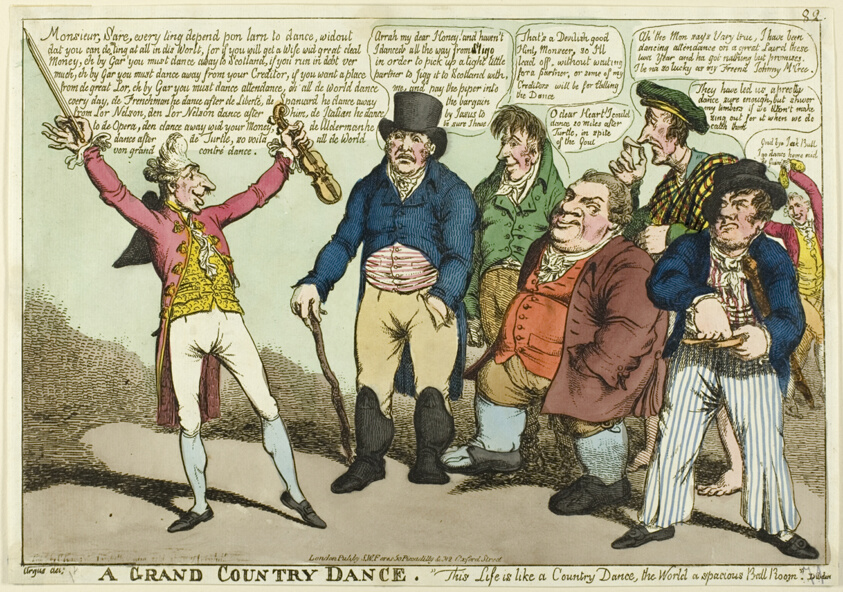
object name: Print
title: A Grand Country Dance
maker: Charles Williams Argus (English, active 1797-1830); published by S.W. Fores (English, 1761-1838)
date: 1805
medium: Hand-colored etching on paper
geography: England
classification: etching; print; prints and drawing